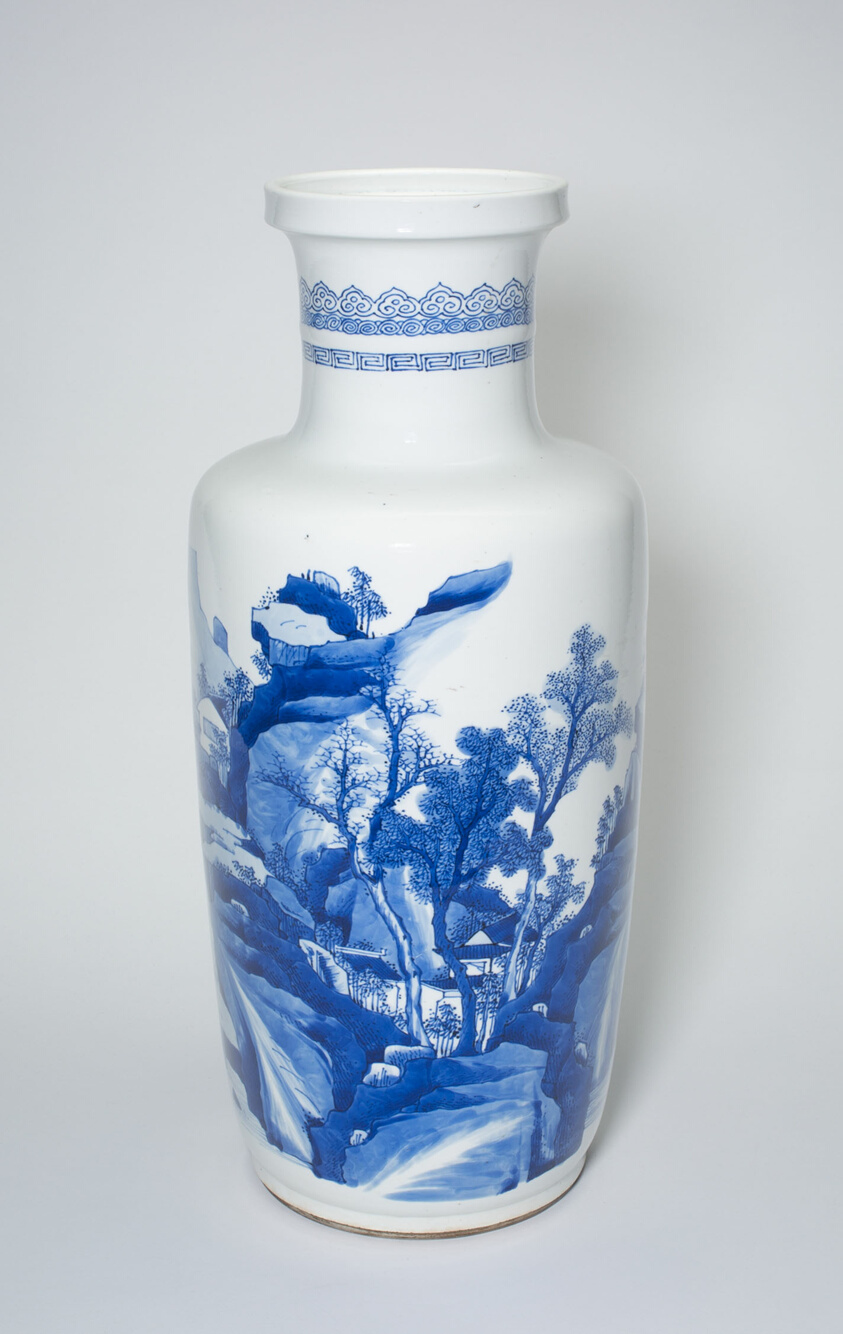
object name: Vessel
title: Baluster Vase with Figures and Pavillions amid Moutaineous Landscape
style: Chinese (culture or style)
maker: China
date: Qing dynasty (1644–1911), Kangxi period (1662–1722)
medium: Porcelain painted in underglaze blue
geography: China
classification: vase; vessel; porcelain; asian art; ceramics